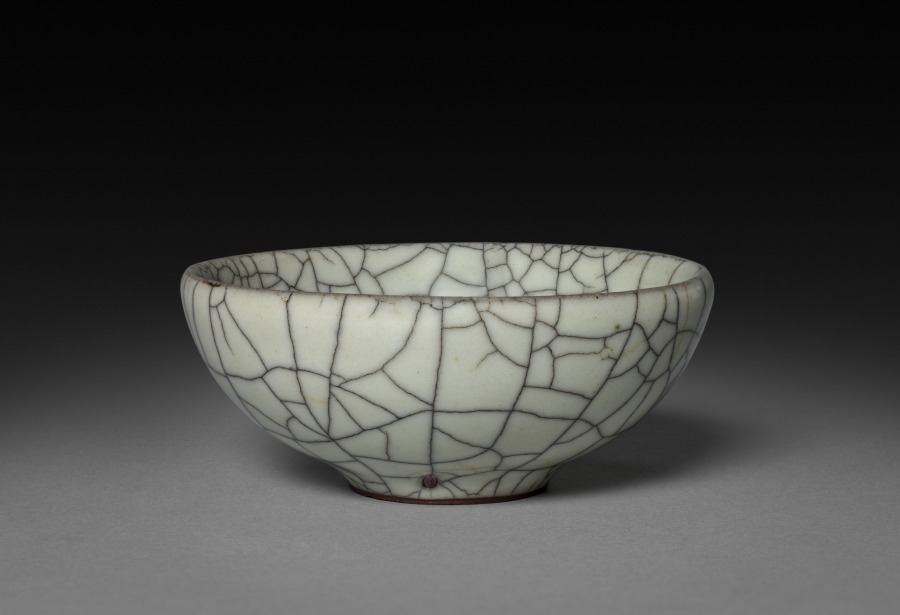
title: Wine Cup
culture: China, Song dynasty (960-1279)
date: 960–1279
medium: Glazed dark brown stoneware, Guan ware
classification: Ceramic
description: Wine was often served hot in porcelain cups that could also be used in popular drinking games.